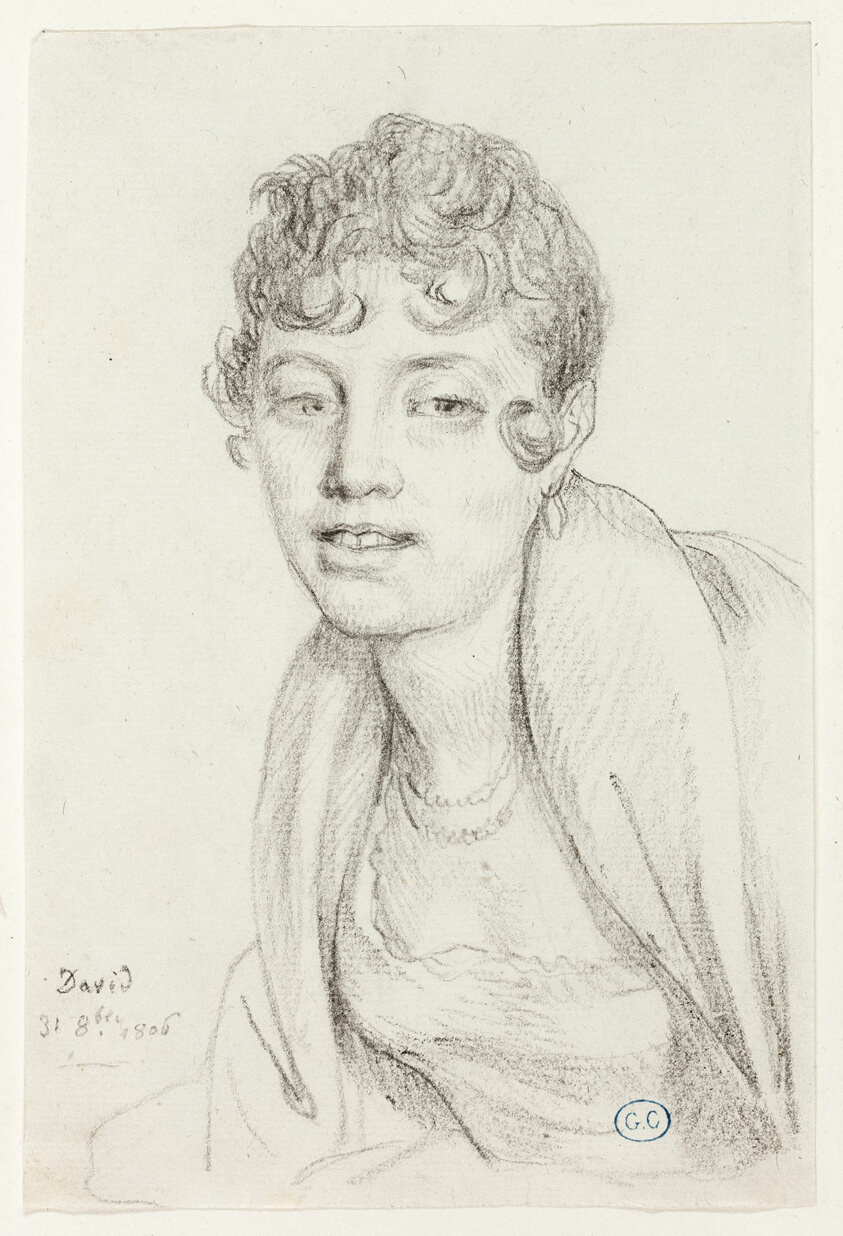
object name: Drawing and Watercolor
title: Bust of Angelique Mongez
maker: Jacques-Louis David; French, 1748-1825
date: 1806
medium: Charcoal on off-white laid paper, tipped onto cream wove paper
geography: France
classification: drawings (visual works); prints and drawing